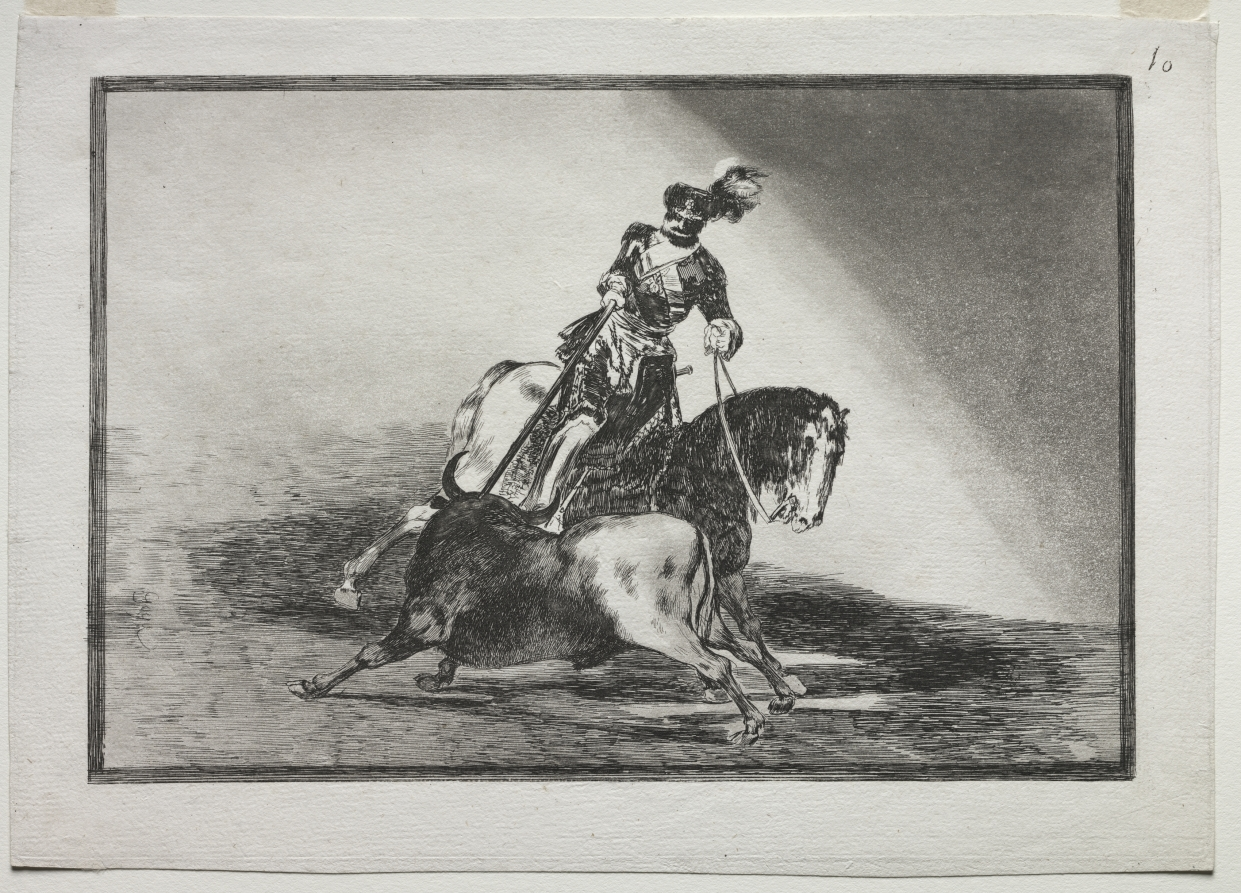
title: Charles V Spearing a Bull in the Ring at Valladolid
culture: Spain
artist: Francisco de Goya (Spanish, 1746–1828)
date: 1815–1816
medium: etching, aquatint, drypoint and engraving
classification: Print